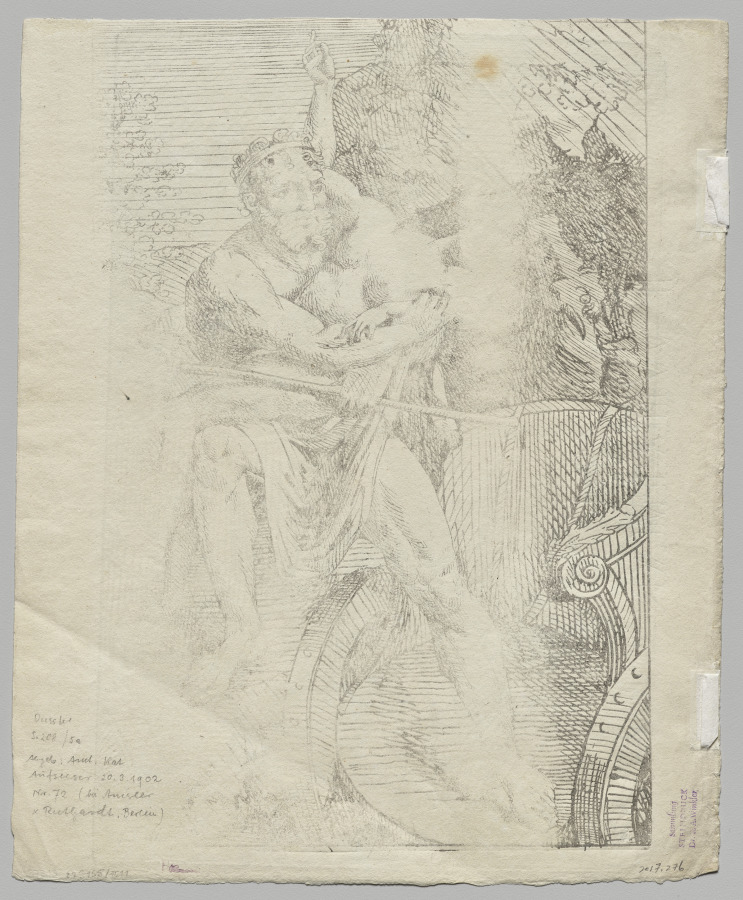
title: The Abduction of Proserpina by Pluto (2nd version)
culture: Germany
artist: Friedrich Wilhelm Reuter (German, 1768–1834)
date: 1803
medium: Pen lithograph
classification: Print